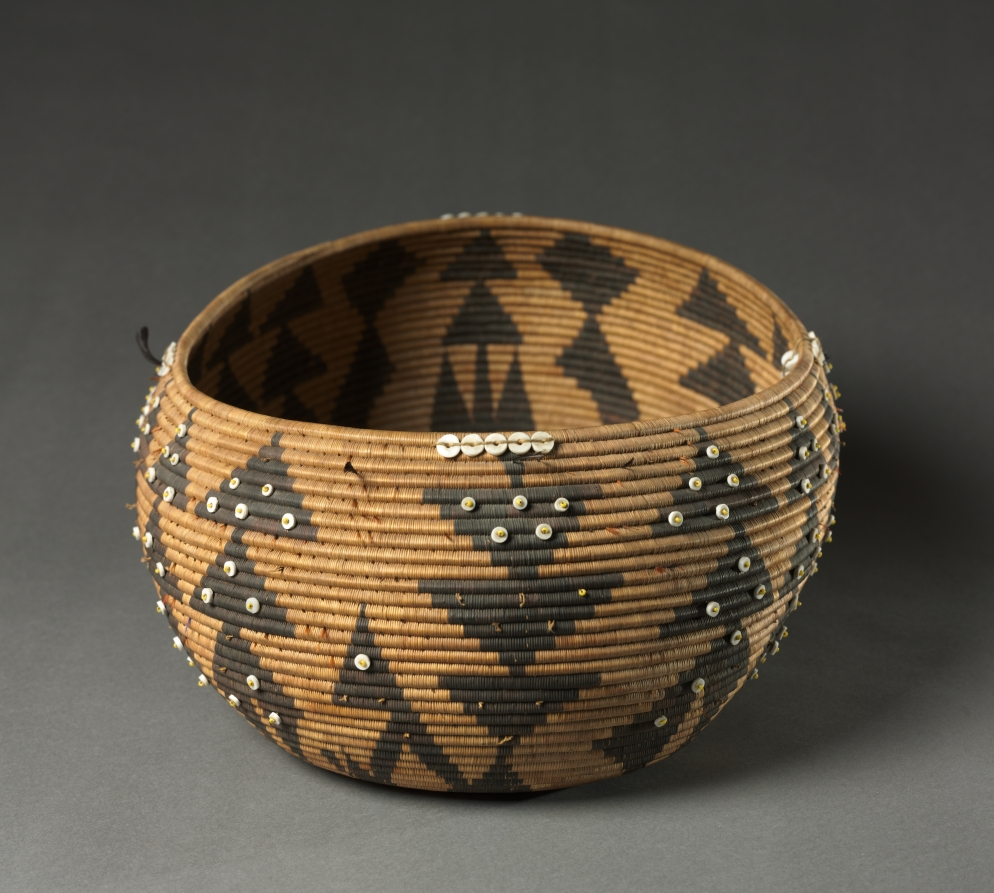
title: Doctor's Basket, Canoe- shaped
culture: California, Pomo, 19th century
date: 1890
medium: coiled, with shell and yellow glass beads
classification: Basketry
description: Oblong baskets like this one, which range in size from miniatures to examples more than four feet long, are sometimes said to have been used by native doctors to store medicines and paraphernalia such as rattles. This one, however, probably was made not for native use but for sale to a turn-of-the-century collector.